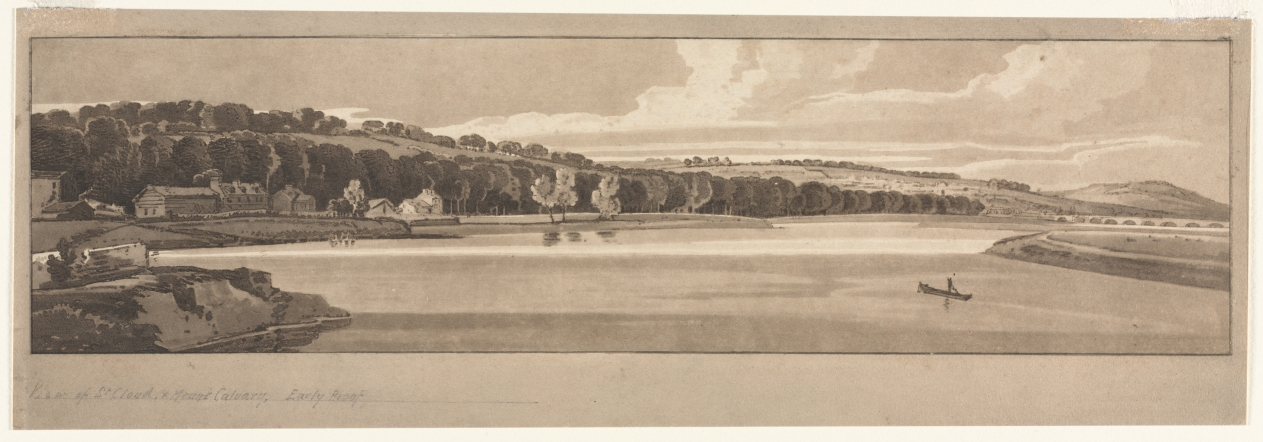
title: A Selection of Twenty of the Most Picturesque Views in Paris: View of St. Cloud and Mount Calvary taken from Pont de Sêve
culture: England, 19th century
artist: Thomas Girtin (British, 1775–1802)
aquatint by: Frederick Christian Lewis (British, 1779–1856)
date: 1802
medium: softground etching and aquatint, printed in brown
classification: Print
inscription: Lower margin, in pencil: View of St. Cloud and Mount Calvary, Early proof